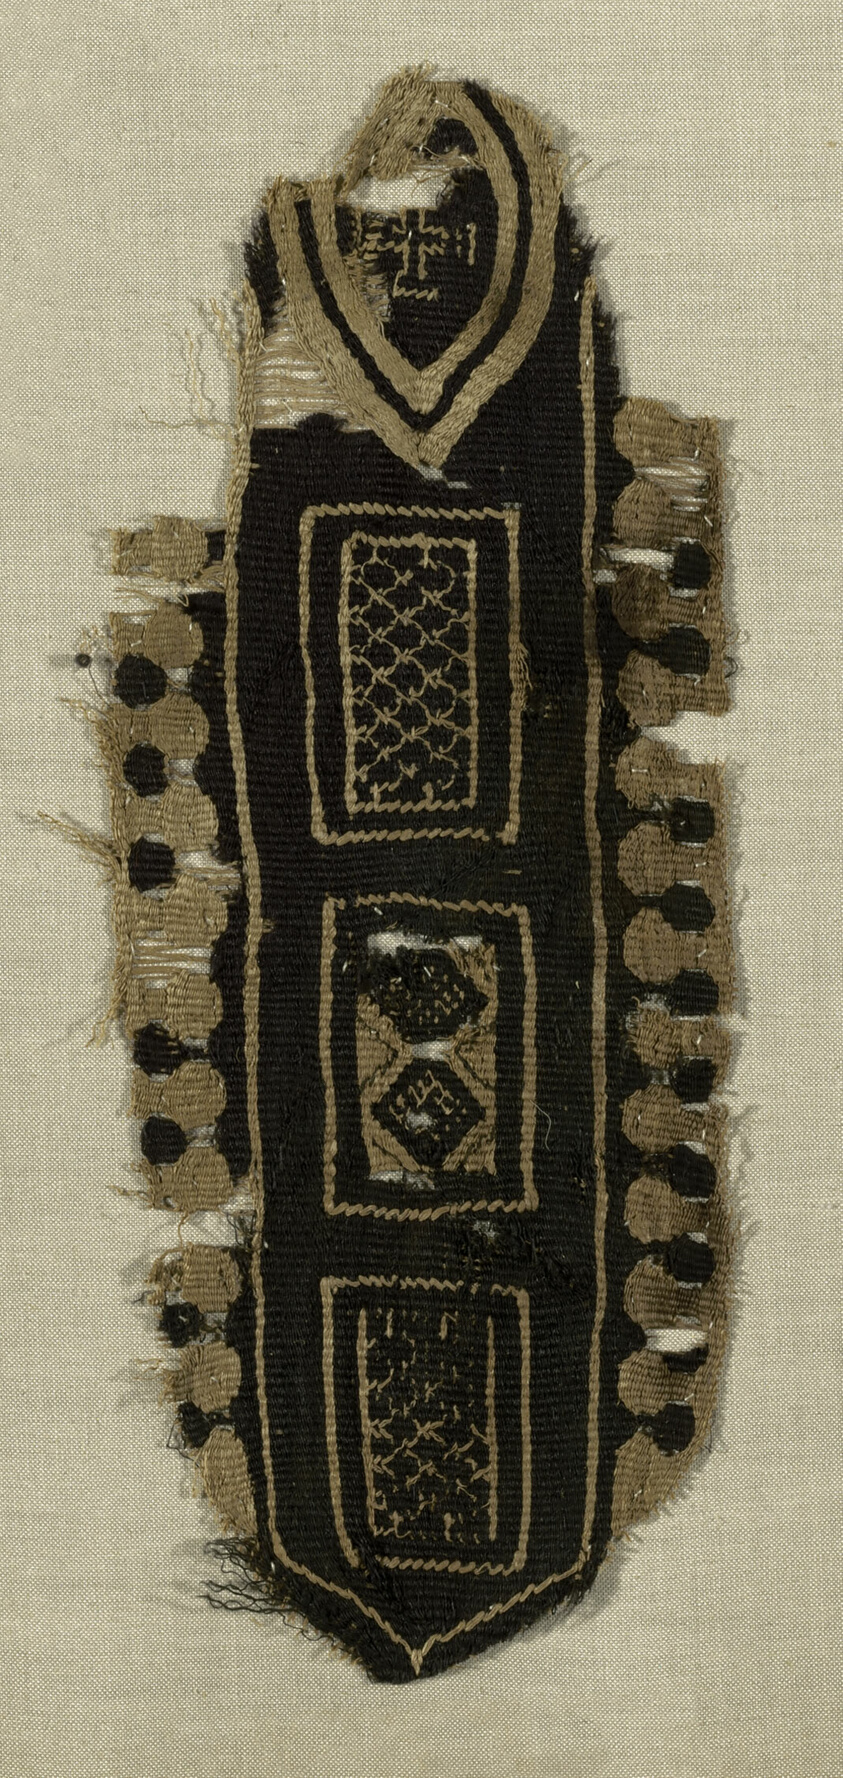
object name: Coverings and Hangings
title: Border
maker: Egypt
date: 5th century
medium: Linen and wool, tapestry weave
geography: Egypt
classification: textile; weaving